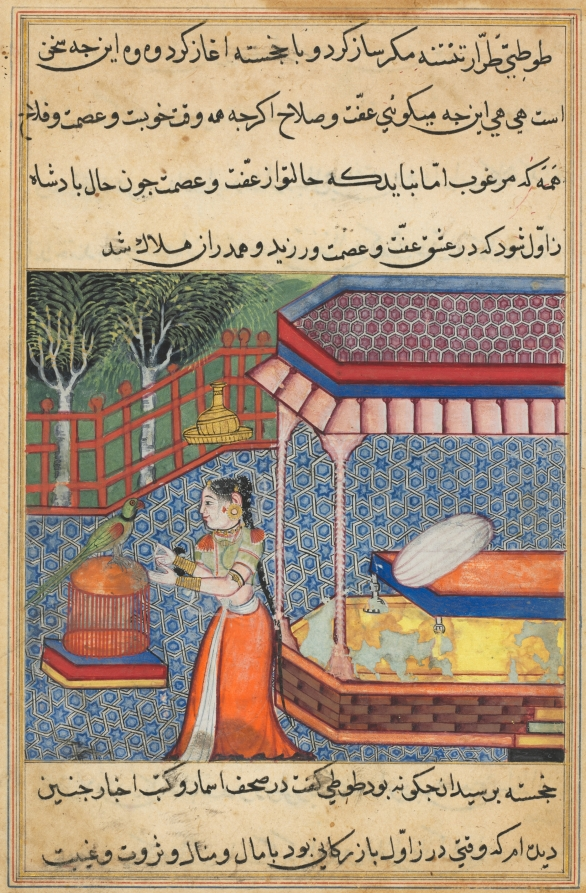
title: The parrot addresses Khujasta at the beginning of the thirty-sixth night, from a Tuti-nama (Tales of a Parrot)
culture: Mughal India, court of Akbar (reigned 1556–1605)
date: c. 1560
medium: gum tempera, ink, and gold on paper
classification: Painting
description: On the thirty-sixty of fifty-two nights, Khujasta stands before Tuti the talking parrot in a brightly patterned courtyard. In order to keep Khujasta from visiting her lover, Tuti begins to tell her the tragic story of the King of Zabul, who fell for a merchant’s daughter and ultimately died as a result of his unrequited love.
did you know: Zabul is a city in southern Afghanistan.